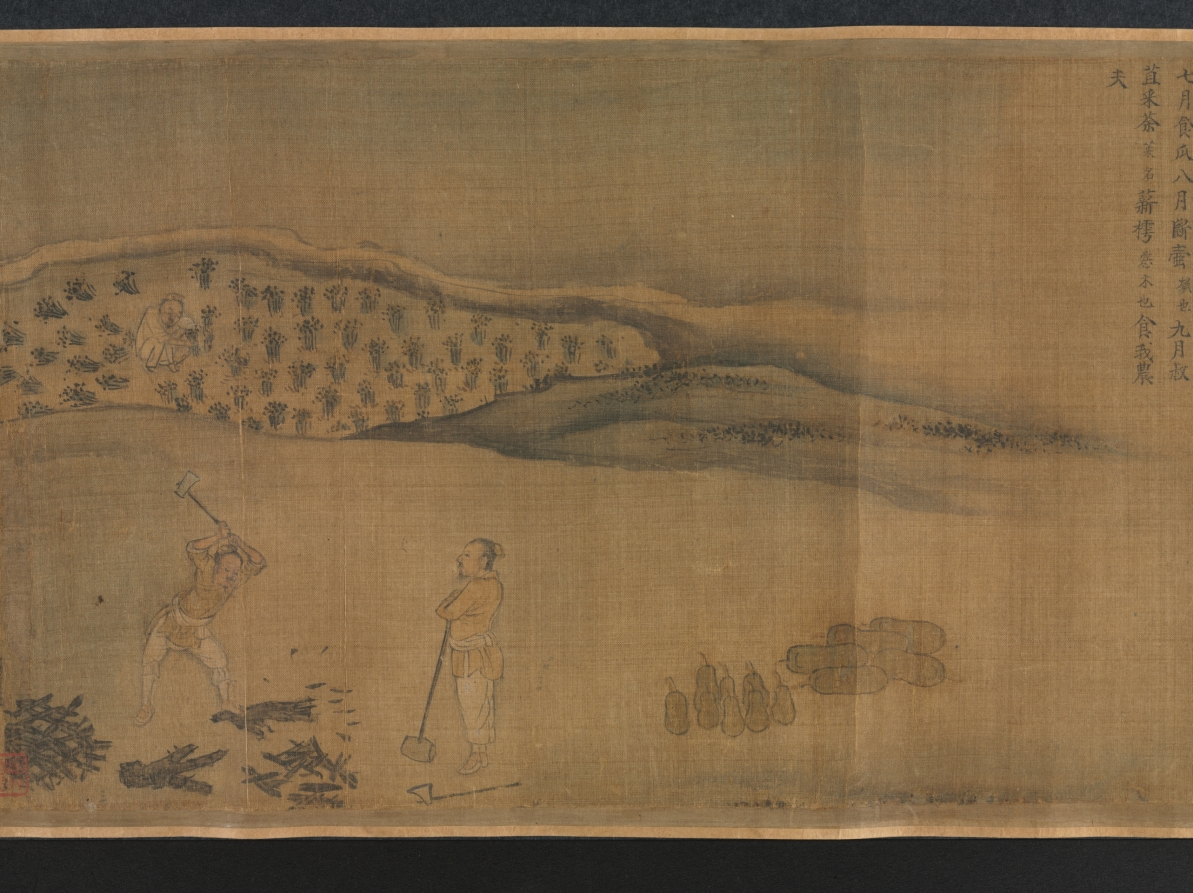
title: "Seventh Month" from the Odes of Bin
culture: China, Southern Song dynasty (1127-1279)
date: 1200s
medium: Handscroll; ink and color on silk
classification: Painting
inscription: Colophons: 1. [on the frontispiece] by the Qianlong emperor (dated 1741). 2. by Lu Wan (dated Zhengde dingchou, 1517). 2. by the Jiaqing emperor (dated 1807).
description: According to Confucian thought, the ruler looks after the well-being of his people which involves agricultural activities. Seventh Month from the ancient Odes of Bin in the Shijing (Book of Poetry) describes occupations throughout the year, including plowing, harvesting, hunting, making clothes, and observing rituals. The earliest illustrations of these Odes accompanied by text were commissioned by Southern Song emperor Gaozong (reigned 1127–1162). As the lower Yangzi delta had become the new seat of government, Gaozong had sets of these illustrations produced by court artists to revive the dynasty and convince the Confucian officialelite of his legitimacy to rule.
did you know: The Odes of Bin appears in the classic Shijing (Book of Poetry), an anthology of more than 300 poems, folk songs, and ceremonial hymns that were originally chanted to music.